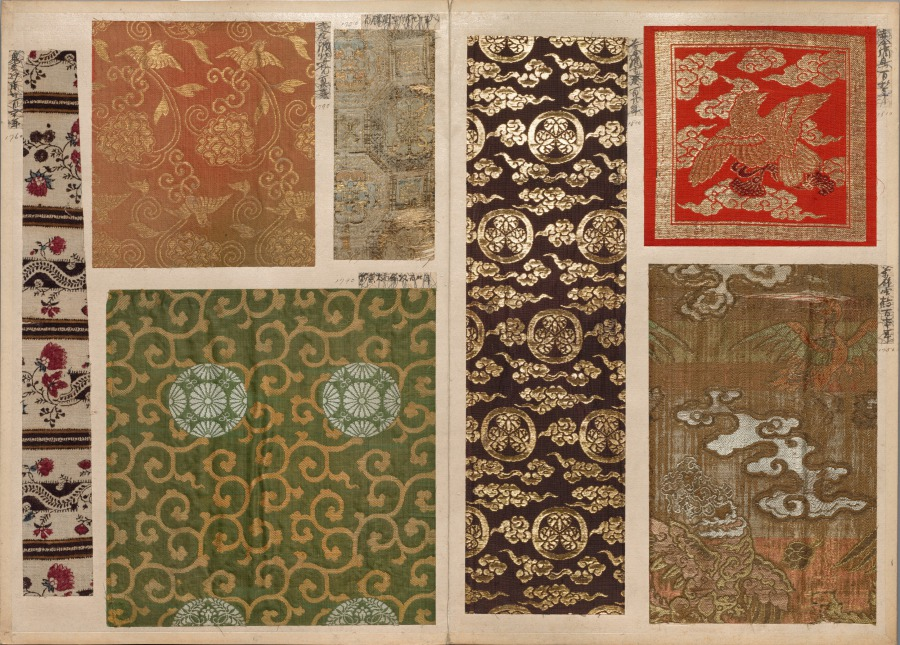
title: Album of Textile Samples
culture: Japan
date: 1790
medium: silk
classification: Textile